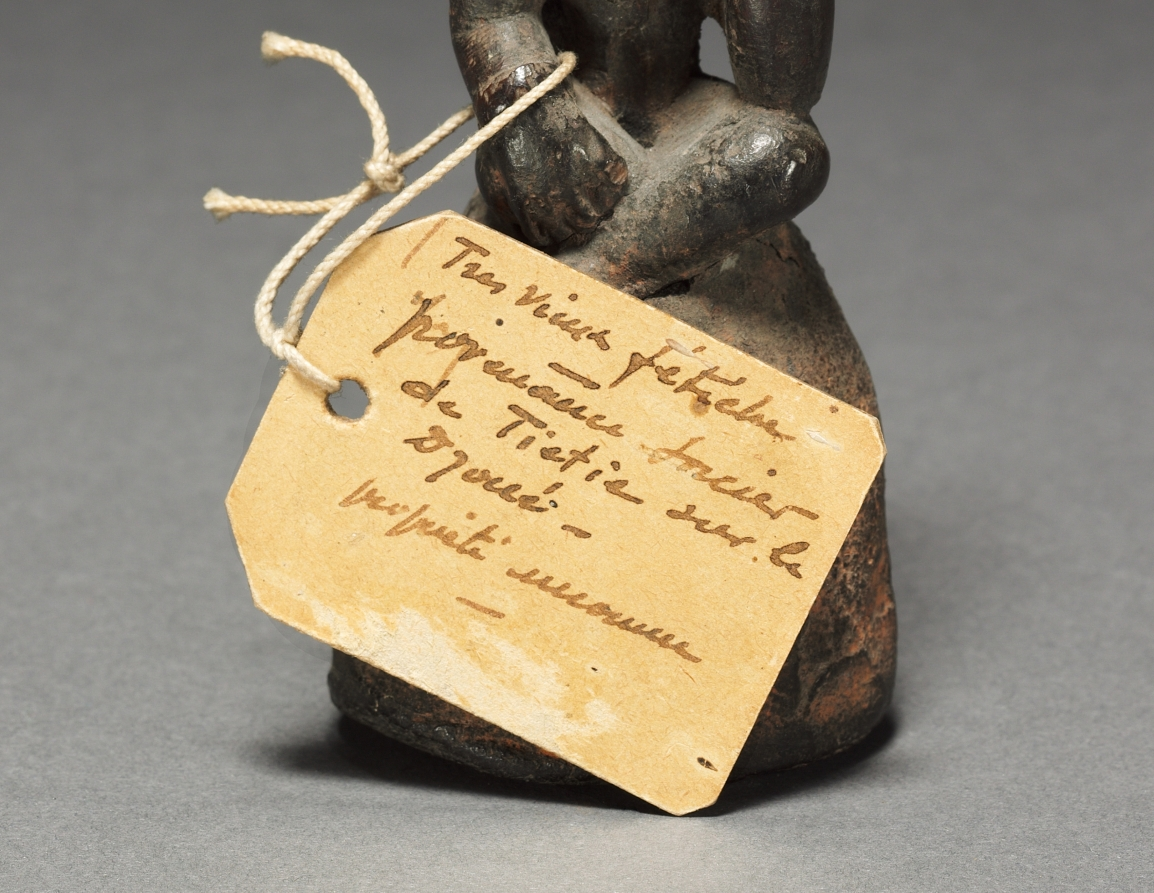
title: Power figure (nkisi)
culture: Africa, Central Africa, Republic of the Congo, Kongo-style maker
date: late 1800s-early 1900s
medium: Wood, organic materials (including resin), cloth, glass, and various other materials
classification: Sculpture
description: One of seven anthropomorphic figurines, these minkisi contained medicines in which an ancestral spirit was believed to reside. The medicines served a metaphorical rather than literal purpose in the resolution of conflicts among Kongo people. This asymmetrical figure wears a mpu headdress of chiefs with its characteristic geometric decoration. The pose may refer to a state of mourning.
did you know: Different from other Minkisi who hold their power in their abdomen, this figure sits atop a sphere in which the active substances still reside.